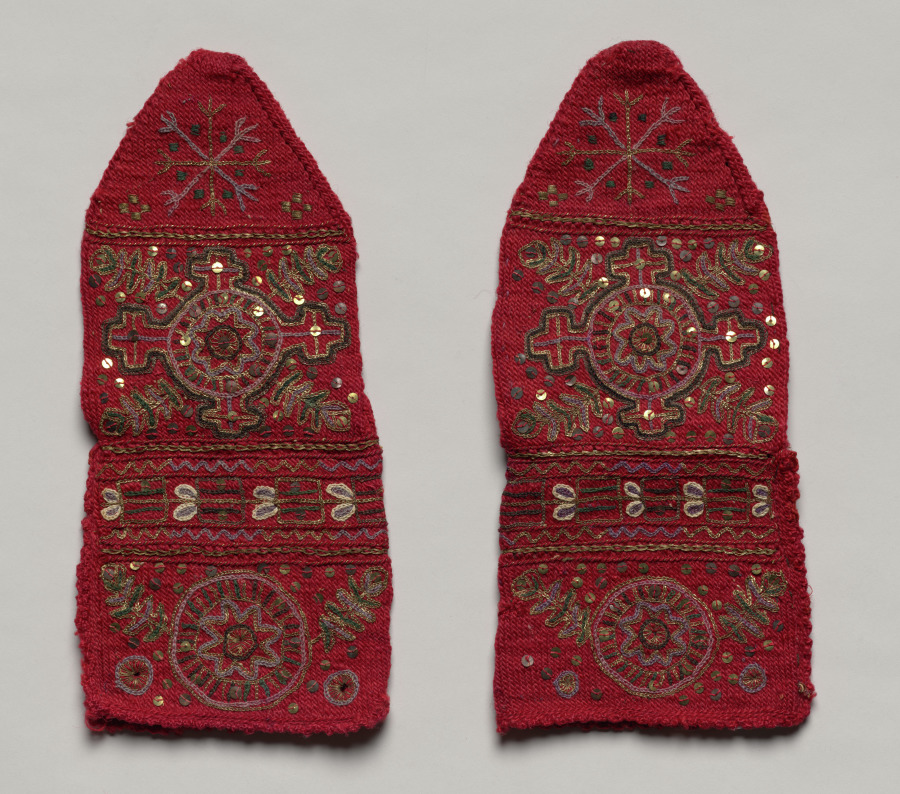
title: Woman's Bridal Socks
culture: Yugoslavia, Serbia, 20th century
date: early 1900s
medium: embroidered wool, gold thread, sequins, knitting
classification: Knitting